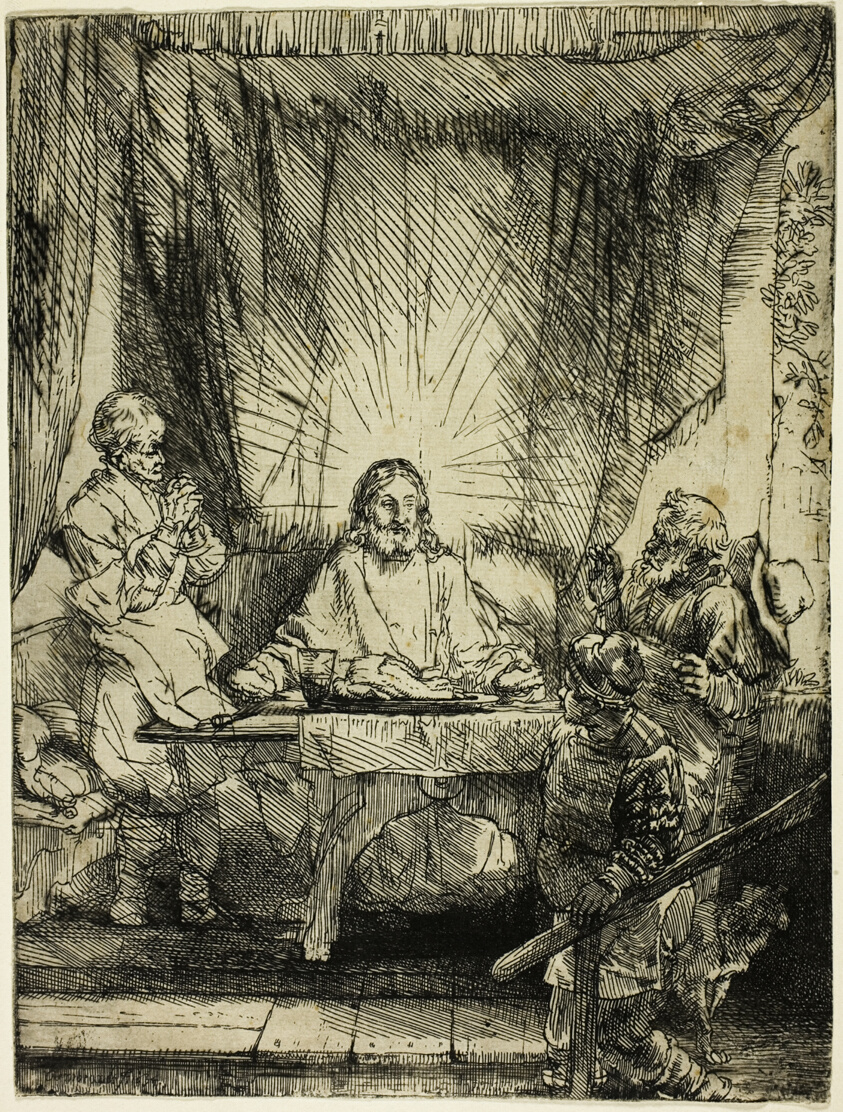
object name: Print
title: Christ at Emmaus: The Larger Plate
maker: Rembrandt van Rijn (Dutch, 1606-1669)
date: 1654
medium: Etching, burin, and drypoint on ivory laid paper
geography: Holland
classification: etching; print; prints and drawing; paper; drypoint; burin